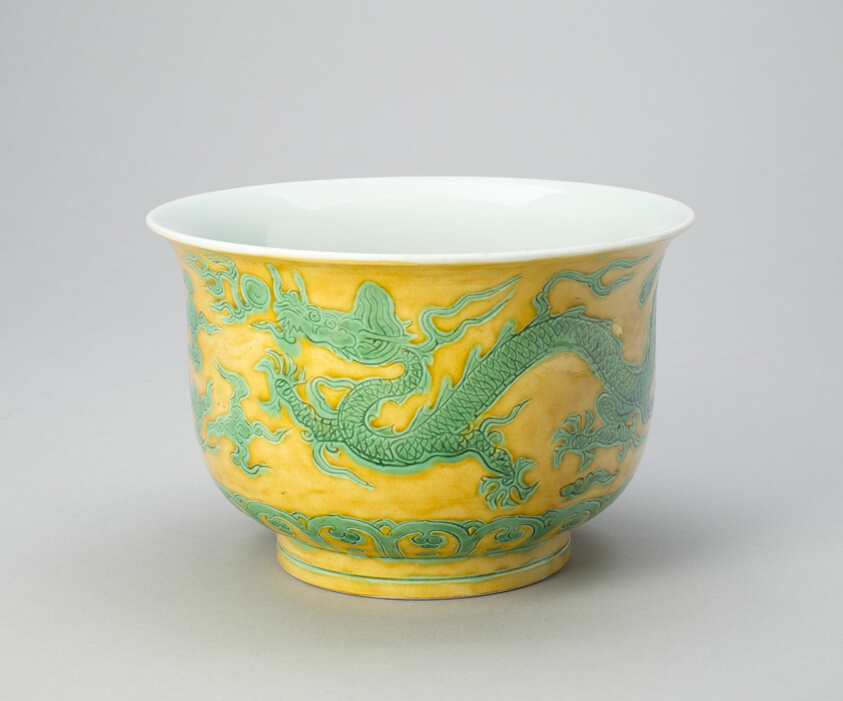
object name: Vessel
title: Cylindrical Bowl with Dragons Chasing a Flaming Pearl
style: Chinese (culture or style)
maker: China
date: Ming dynasty (1368–1644), Zhengde reign mark and period (1506–1521)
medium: Porcelain with overglaze yellow and green enamels, ground with incised decoration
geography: China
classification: bowl; porcelain; dish (vessel); ceramics; asian art; vessel